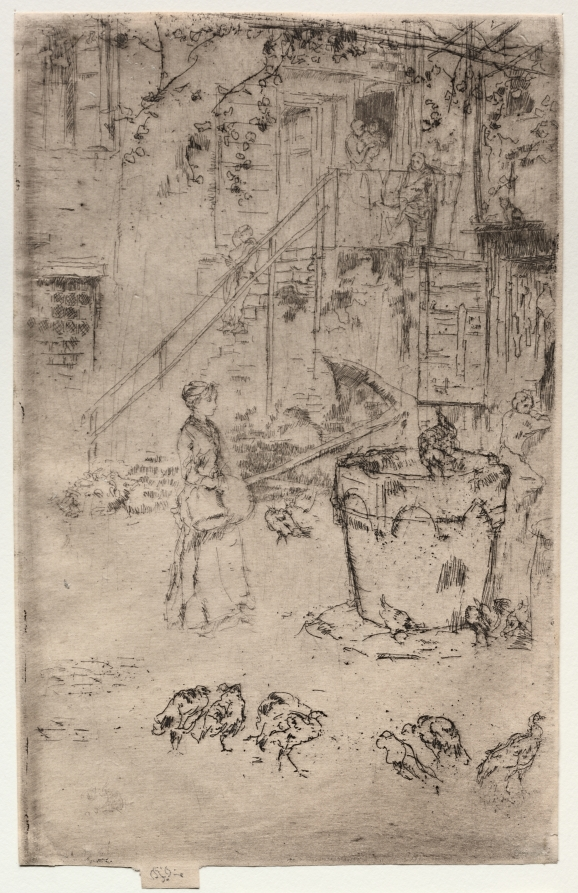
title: Turkeys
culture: America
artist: James McNeill Whistler (American, 1834–1903)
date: 1880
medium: etching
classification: Print